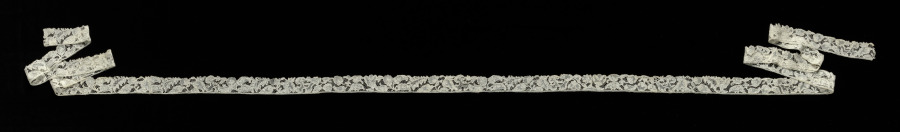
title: Lace Edging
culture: France, Alençon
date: 1700–1740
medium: Linen: needle lace (Point d'Alençon)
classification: Lace